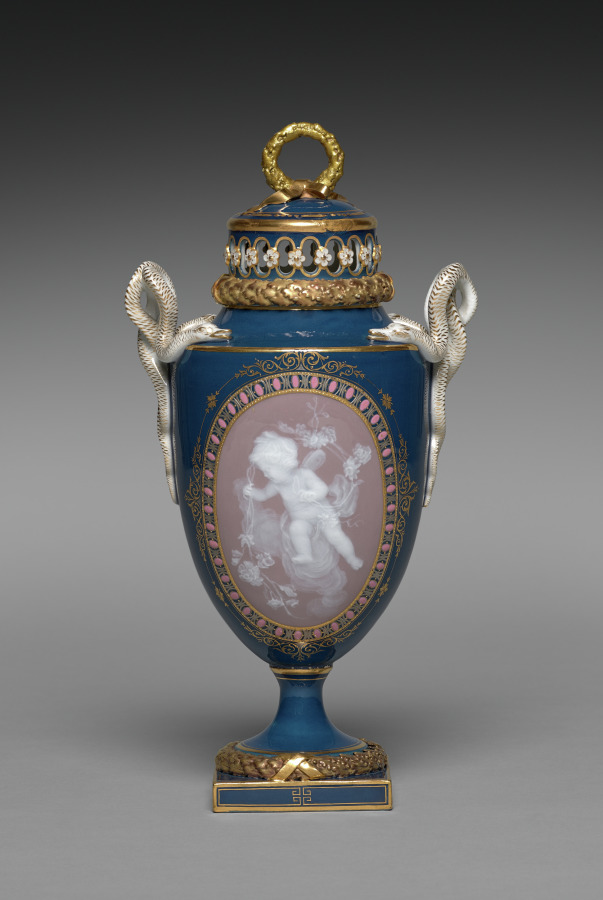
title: Covered Vase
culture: Germany, 19th century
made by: Meissen Porcelain Factory (German, est. c. 1710)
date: 1881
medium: porcelain with pâte-sur-pâte decoration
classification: Ceramic